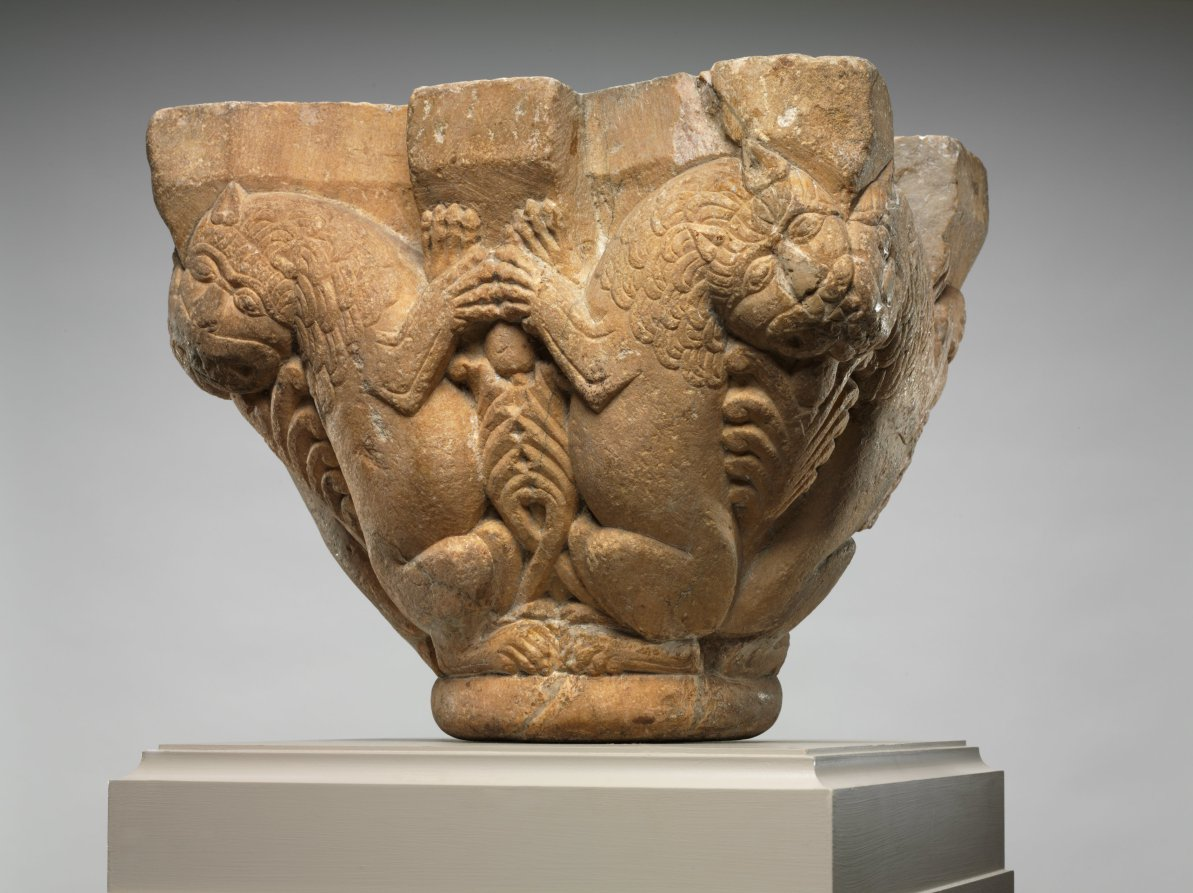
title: Engaged Capital with Lions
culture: Northern Spain (Navarre ?) or Southwest France (Pyrénées or Roussillon ?), mid-12th century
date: 1145–64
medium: marble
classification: Sculpture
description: The compositional motif of confronted and addorsed beasts illustrated on this capital was especially popular in churches along the pilgrimage roads.